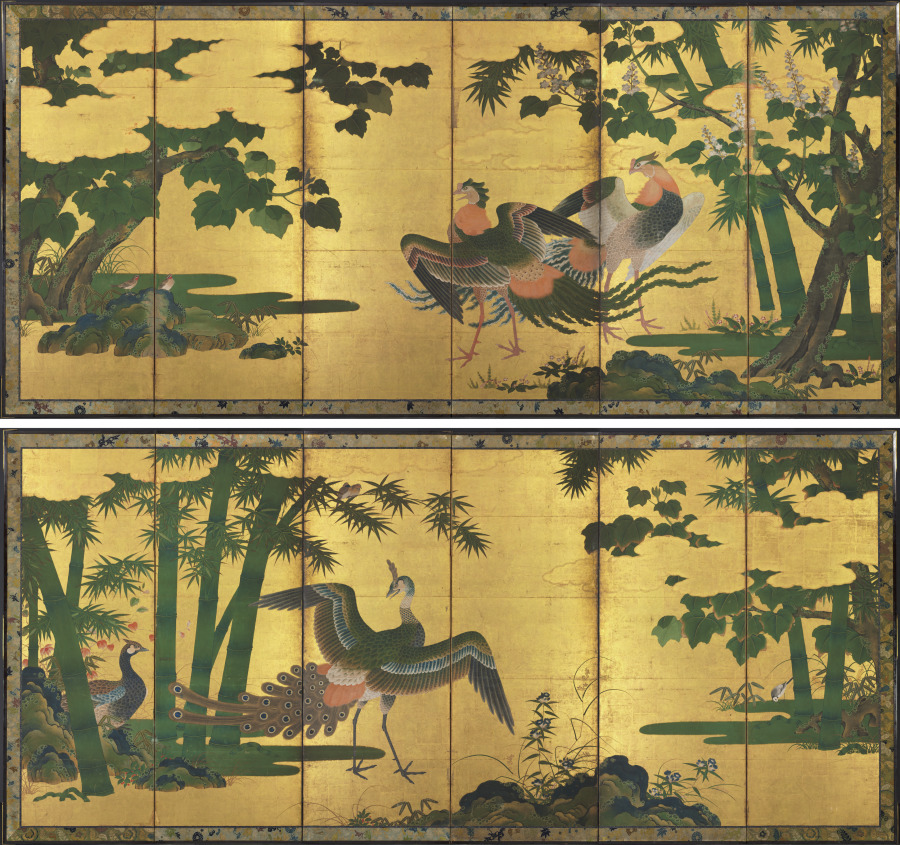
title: Peafowl and Phoenixes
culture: Japan, Momoyama period (1573–1615)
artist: attributed to Tosa Mitsuyoshi (Japanese, 1539–1613)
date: late 1500s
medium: Pair of six-panel screens; ink, color, and gold on gilded paper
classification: Painting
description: Phoenixes are fantastical birds said to inhabit paulownia trees and eat bamboo, and to celebrate virtuous rulers. Peafowl are birds that amuse themselves in the lake of the Buddha Amida’s Pure Land, a paradise where many once hoped to find themselves after death. Both birds appeared on Japanese textiles or paintings in the 1500s and 1600s, used in official ceremonies centered around emperors.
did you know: Members of the Tosa studio of painters once served as heads of the imperial painting bureau.